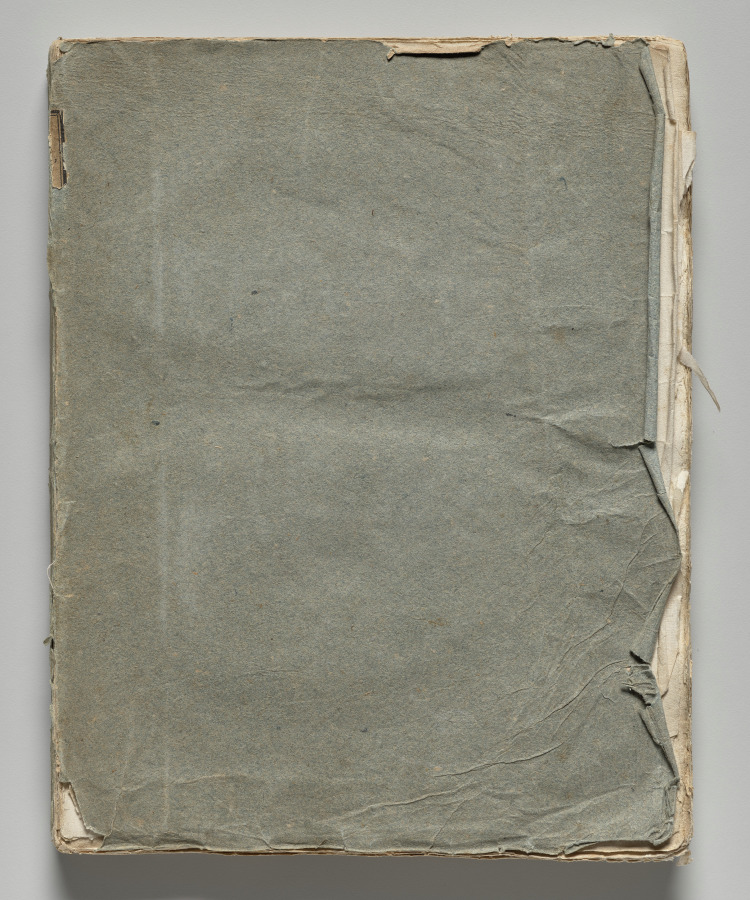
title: Aloys Senefelder, Inventor of Lithography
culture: England, 19th century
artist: John Gendall (British, 1790–1865)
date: 1819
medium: lithograph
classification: Print